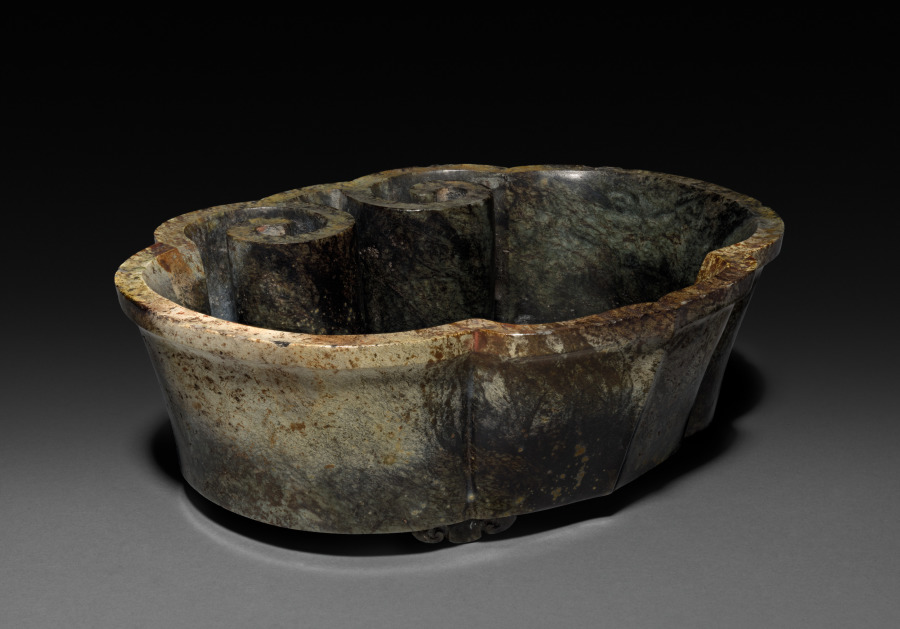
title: Fish Bowl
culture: China, Song dynasty (960-1279) or later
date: 960–1279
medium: jade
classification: Jade